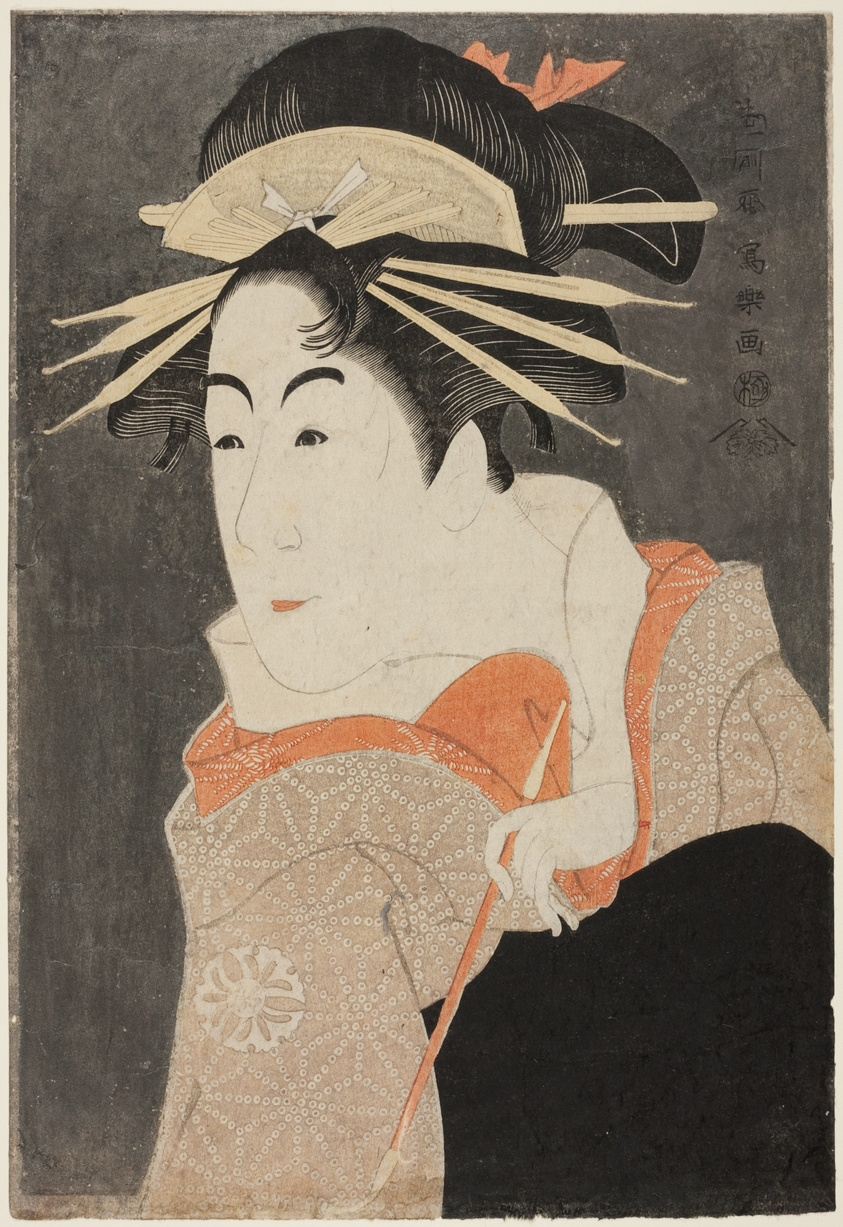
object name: Print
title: The actor Matsumoto Yonesaburo as Shinobu in the guise of the courtesan Kewaizaka no Shosho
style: Japanese (culture or style)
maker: Toshusai Sharaku 東洲斎 写楽; Japanese, active 1794-95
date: 1794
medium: Color woodblock print; oban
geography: Japan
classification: woodblock print; print; asian art